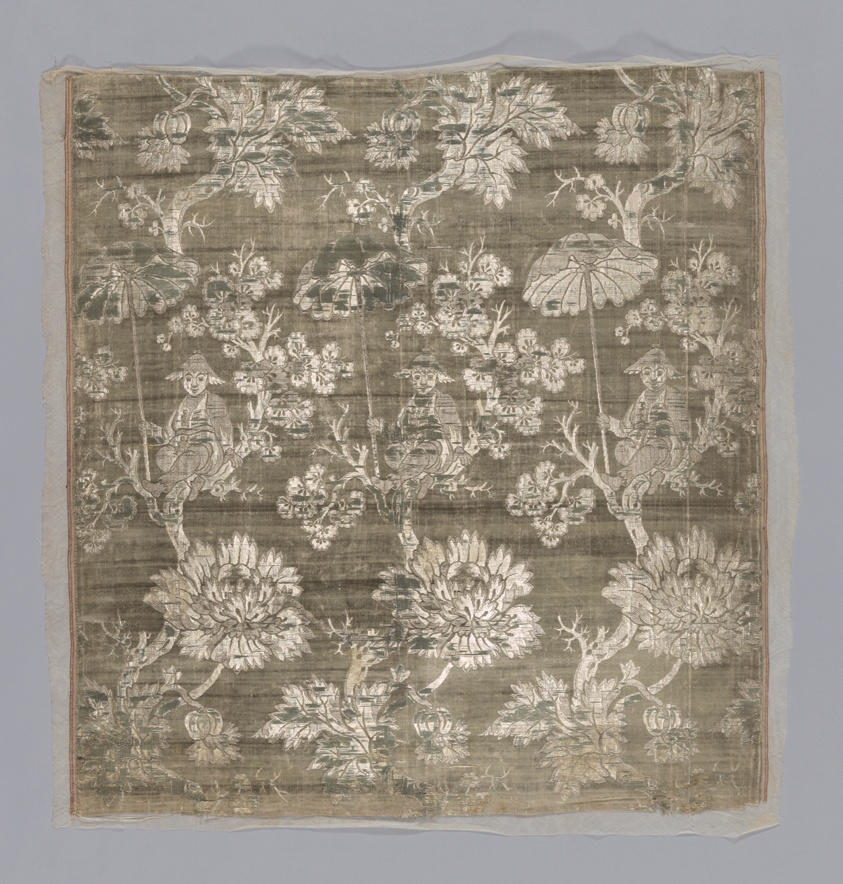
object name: Textile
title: Panel (Dress Fabric)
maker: China or France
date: Qing dynasty (1644–1911), Possibly mid–18th century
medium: Silk, warp-float faced 7:1 satin weave with supplementary binding warps tying supplementary patterning wefts in twill and self-patterning ground wefts in plain interlacings; two selvages present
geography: China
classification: textile; weaving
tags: men, parasols, chrysanthemums